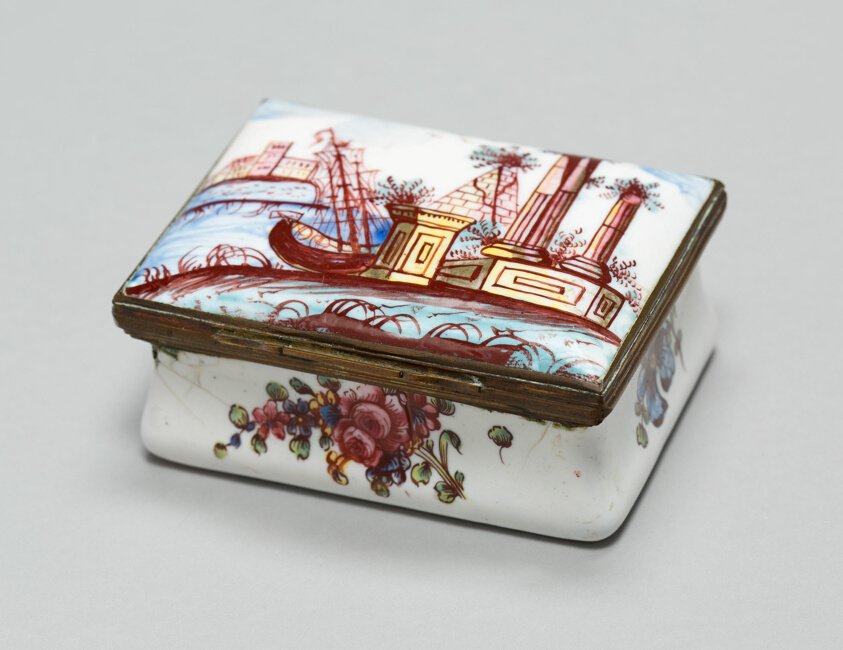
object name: Metalwork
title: Box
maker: Bilston, England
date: c. 1785/1800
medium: Metal and enamel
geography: Bilston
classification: enamel; metalwork